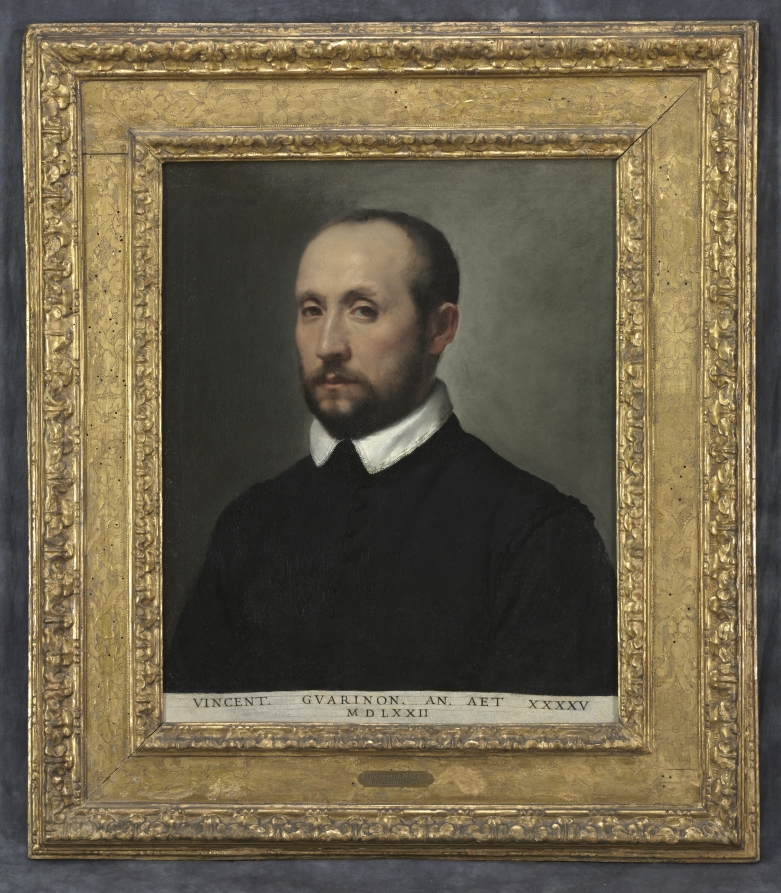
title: Portrait of Vincenzo Guarignoni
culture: Italy, Bergamo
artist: Giovanni Battista Moroni (Italian, 1525–1578)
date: c. 1572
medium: oil on canvas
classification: Painting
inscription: Inscribed at bottom: "VINCENT. GVARINON. AN. AET. XXXXV / MDLXXII"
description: The Latin inscription gives the sitter's name and age (45), as well as the painting's date. Guarignoni came from a prominent family in the northern Italian city of Bergamo. His direct and thoughtful gaze enhances the painting’s lifelike quality, while the solemn detachment conveys dignity and excellence rather than an exact personality, a common approach in Renaissance portraiture.